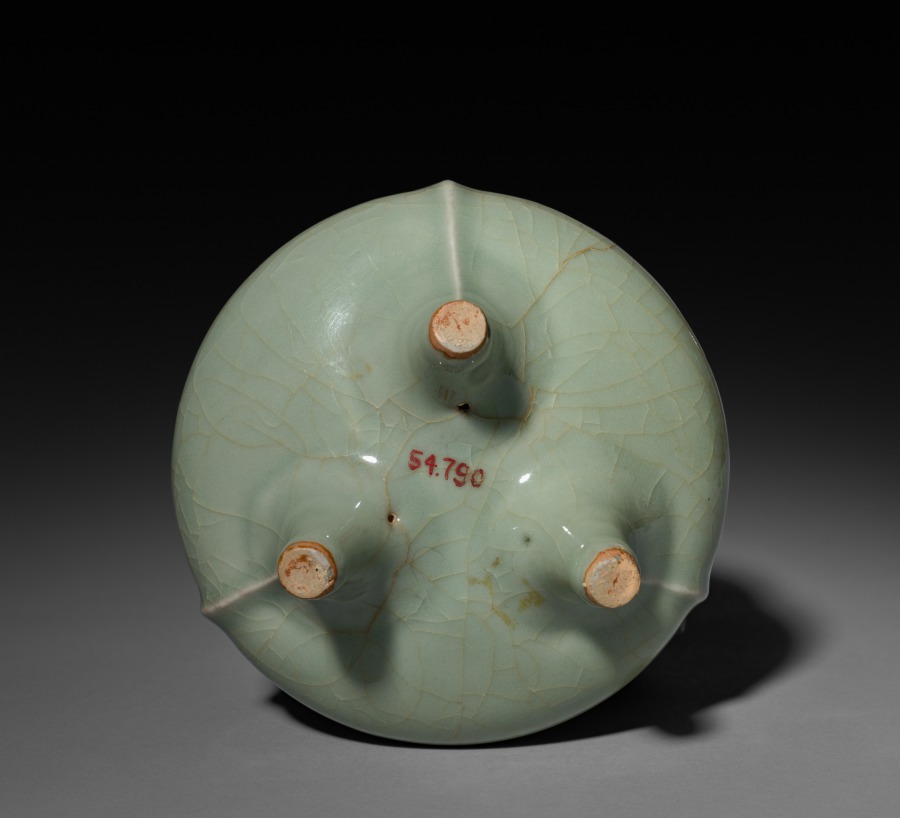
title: Incense Burner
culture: China, Southern Song dynasty (1127-1279)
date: 960–1279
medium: glazed porcelain, Longquan ware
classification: Ceramic